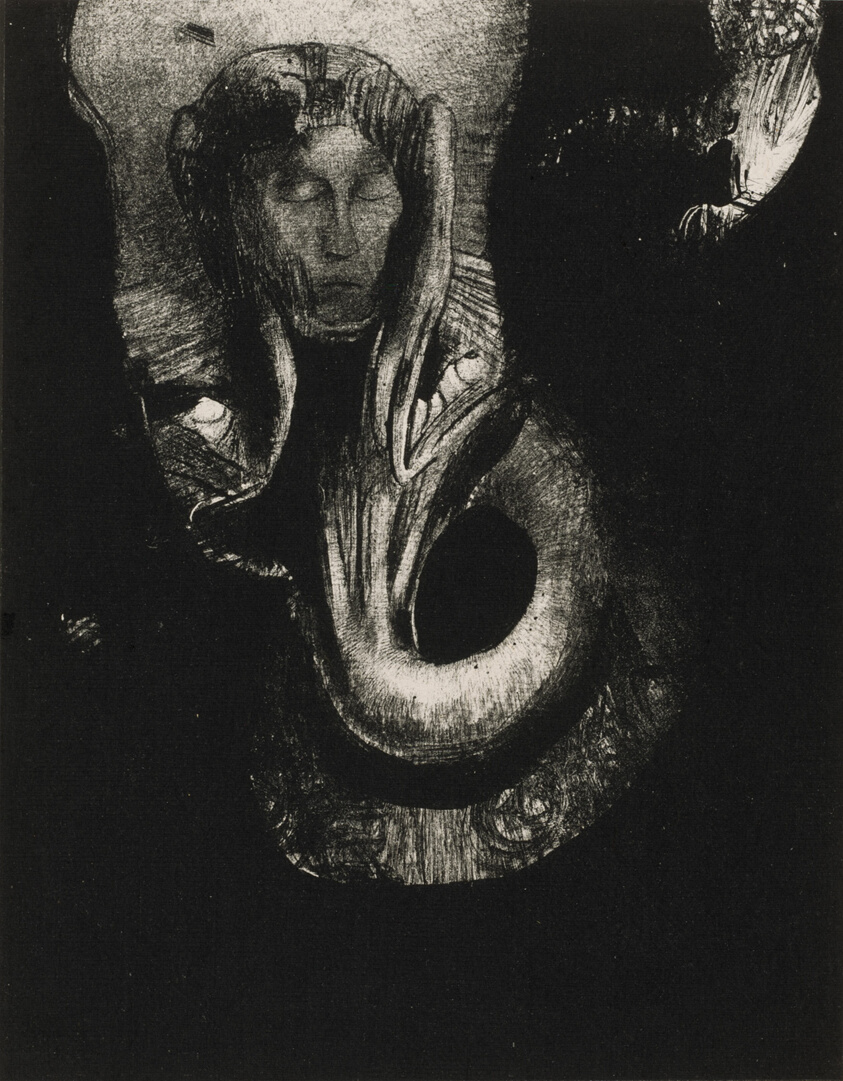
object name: Print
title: Oannes: "I, the first consciousness in Chaos, rose from the abyss to harden matter, to determine forms," plate 14 from The Temptation of Saint Anthony (3rd series)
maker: Odilon Redon (French, 1840-1916)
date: 1896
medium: Lithograph in black on ivory China paper laid down on ivory wove paper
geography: France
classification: lithograph; print; prints and drawing; paper